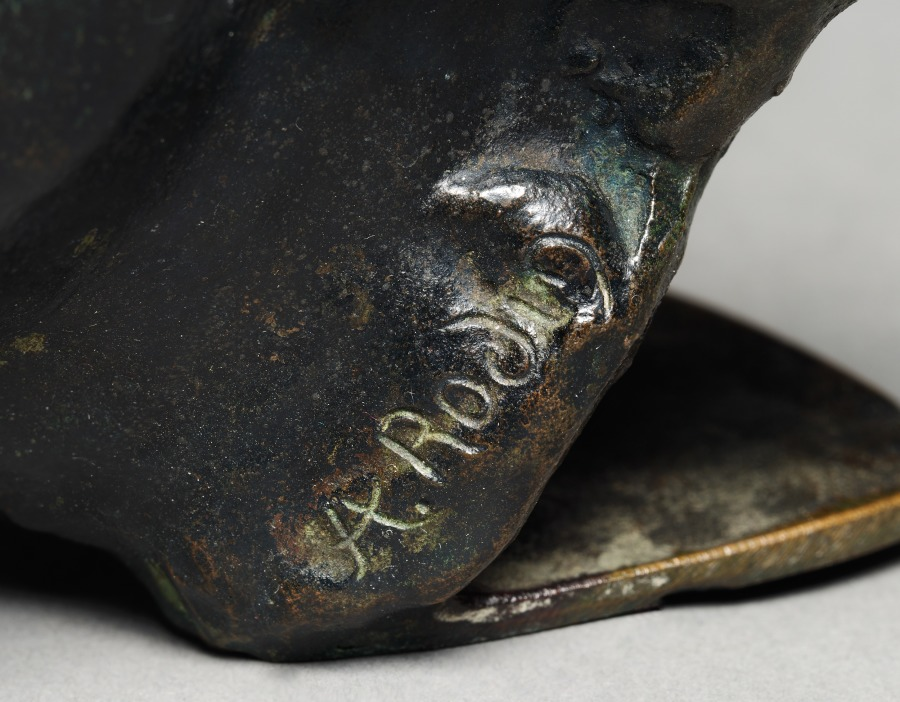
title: Mask of Séverine (Caroline Rémy)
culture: France, 19th century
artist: Auguste Rodin (French, 1840–1917)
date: 1893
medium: bronze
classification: Sculpture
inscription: Signed sinister side of neck: "A. Rodin"; inside dexter side in relief: "A. Rodin"